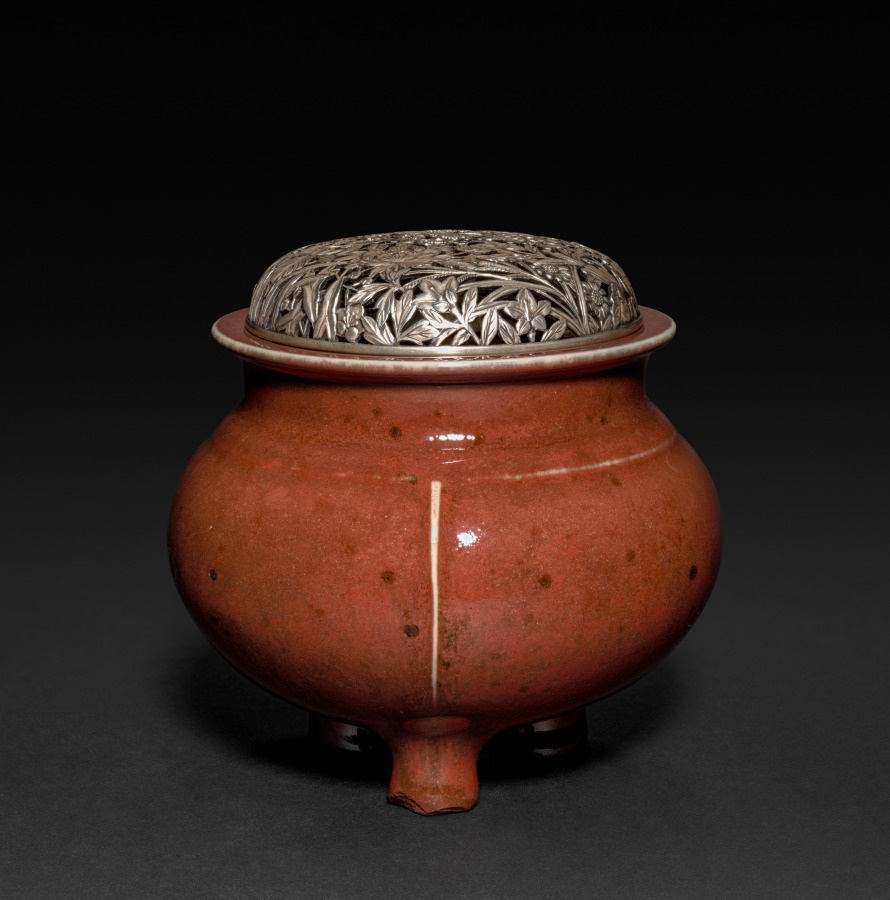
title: Incense Burner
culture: Japan, Meiji period (1868–1912)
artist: Seifū Yohei III (Japanese, 1851–1914)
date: 1893–97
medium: Porcelain with molded design, crimson glaze, and floral openwork silver lid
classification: Ceramic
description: Seifū Yohei III made incense burners in a wide variety of designs and styles. Their silver lids were produced outside the studio by metalwork specialists. This tripod incense burner has a distinctive red-colored glaze and linear molded decorations that run around the base of the collar and down the legs.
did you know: Seifū Yohei III’s incense burner with a variety of flowers on its lid has a glaze described as “crimson glaze” (kōyū); it is also dappled with dark spots of varied opacity and tiny pores throughout, which gives the container a rich, textured effect.